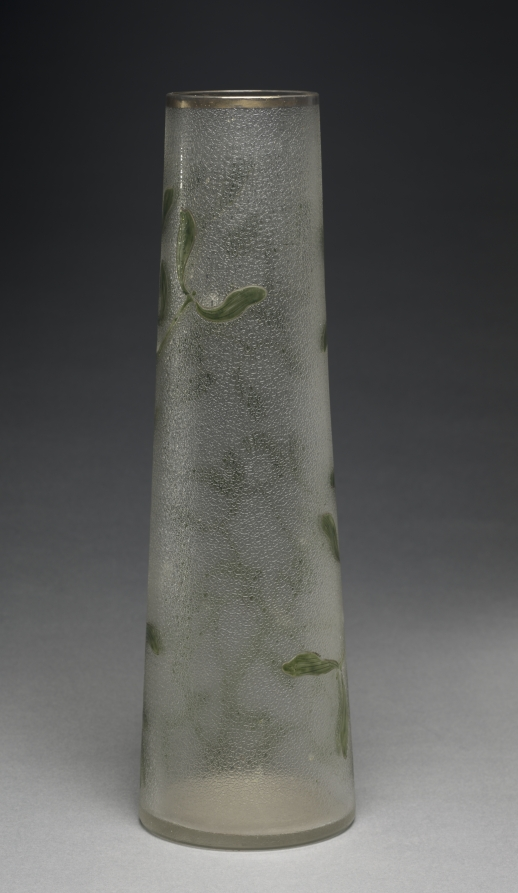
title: Tall Vase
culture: France, Clichy, late 19th-early 20th Century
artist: attributed to Appert Frères (French)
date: c. 1900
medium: glass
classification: Glass